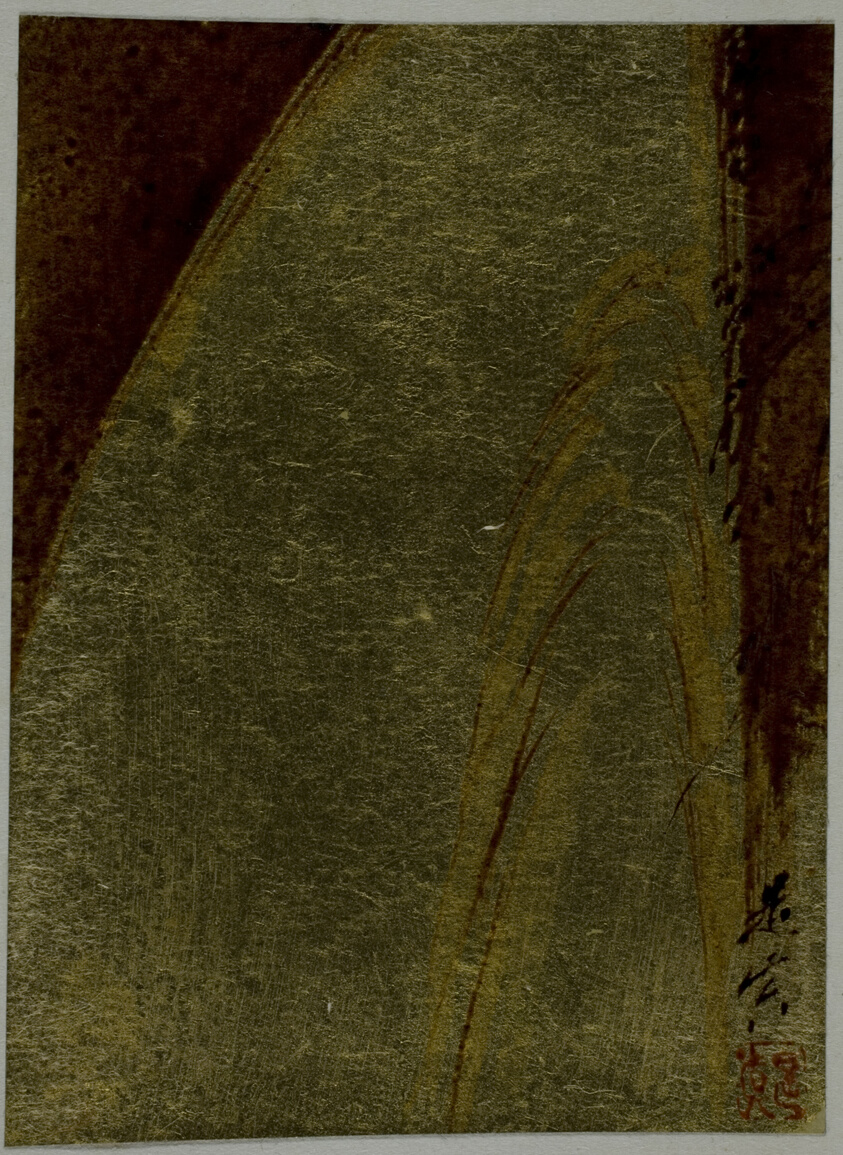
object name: Painting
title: Waterfall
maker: Shibata Zeshin (Japanese, 1807-1891)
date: Meiji period 1868–1912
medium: Album leaf; inks and color on paper.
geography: Japan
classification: album leaf; album/sketchbook; asian art; painting